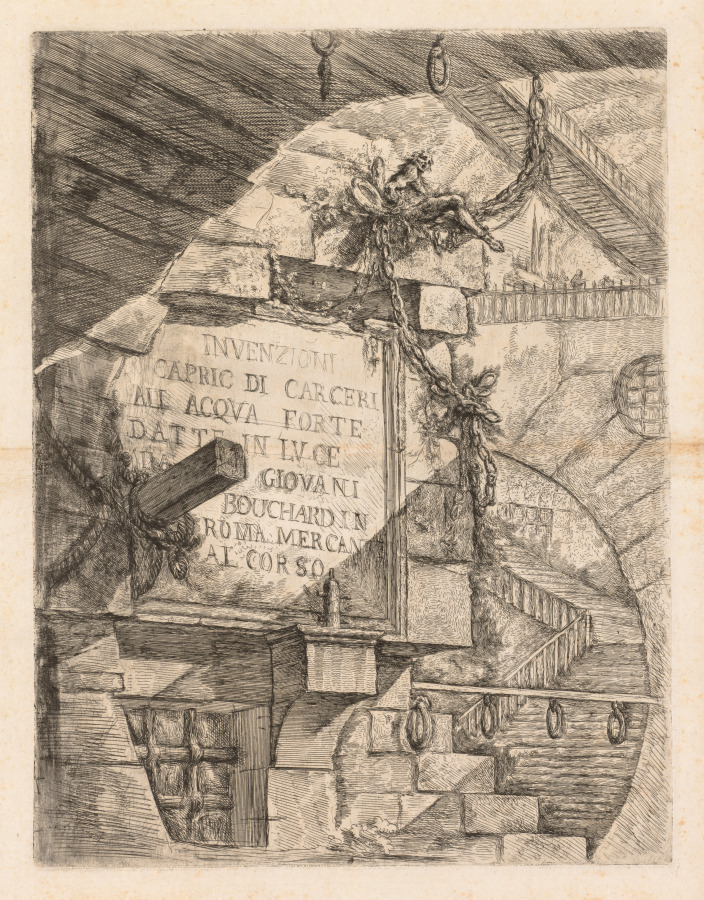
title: The Prisons: Title Page -- Interior of a Prison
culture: Italy, 18th century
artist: Giovanni Battista Piranesi (Italian, 1720–1778)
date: 1745–1750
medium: etching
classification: Print